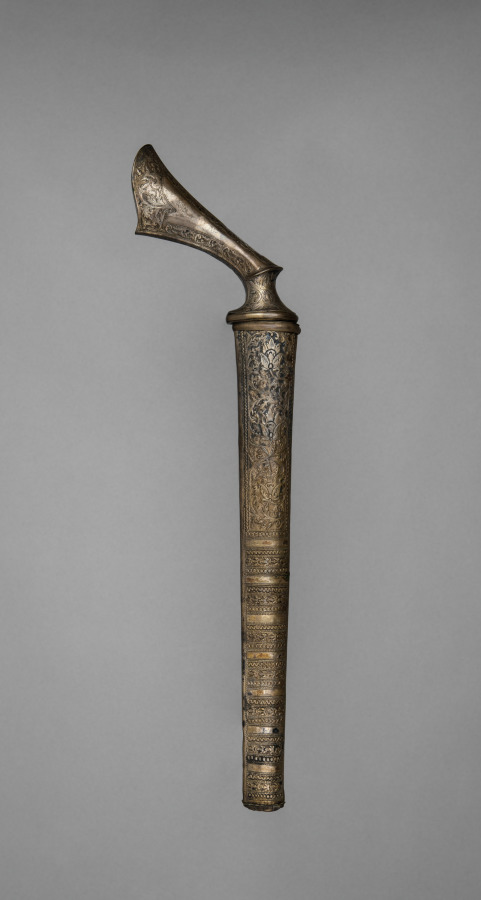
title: Knife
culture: Sumatra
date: 1500s–1800s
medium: Blade: steel; handle: copper alloy with silver gilt; scabbard: copper alloy, silver gilt, wood, and textile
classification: Arms and Armor